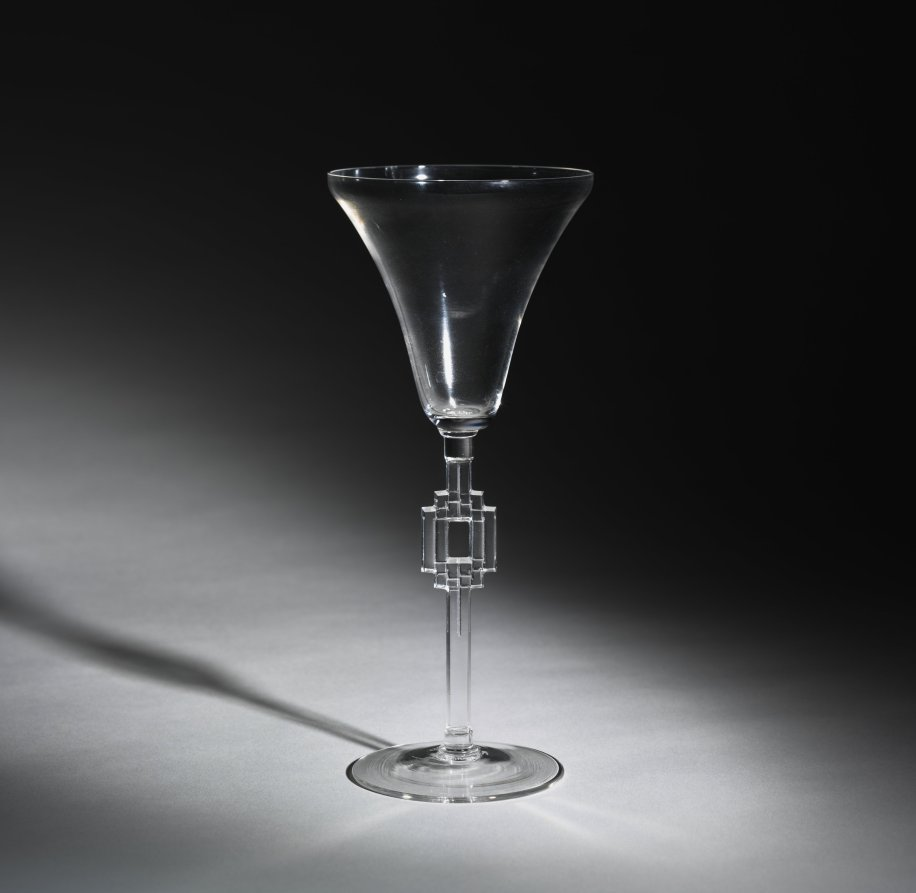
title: Wine Glass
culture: France, 20th century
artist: René Lalique (French, 1860–1945)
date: 1925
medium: glass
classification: Glass